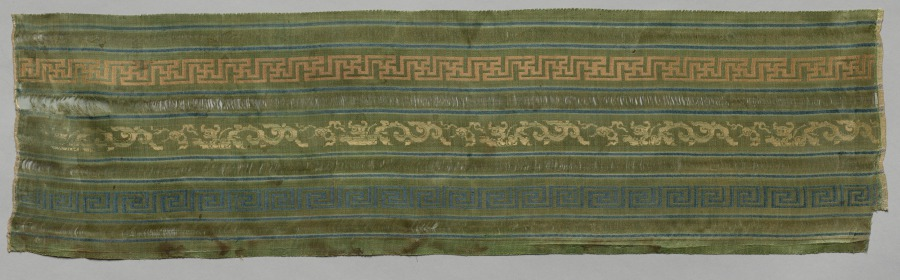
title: Fragment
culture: China, 19th century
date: 1800s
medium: silk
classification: Textile